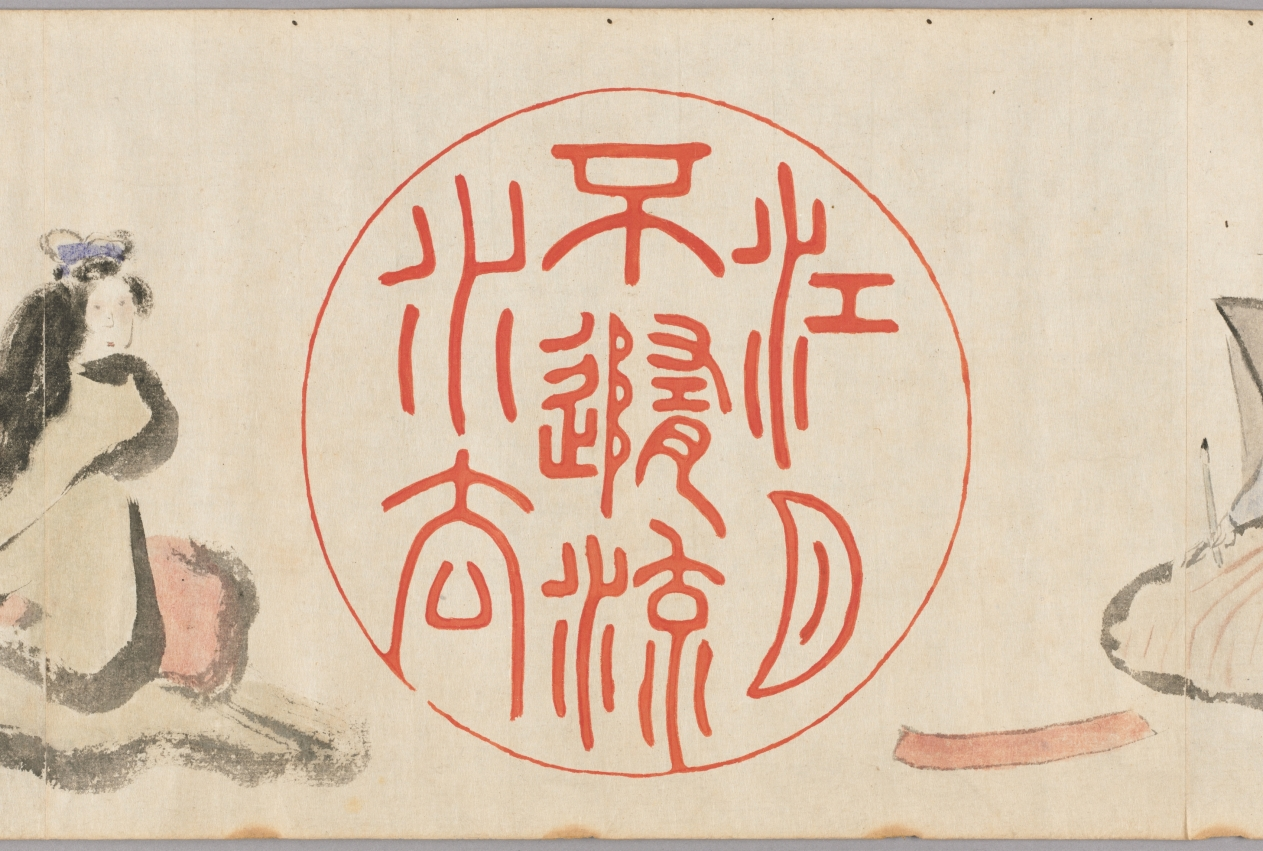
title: Chinese Seals and Poets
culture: Japan, Edo period (1615–1868)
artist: Hosokawa Rinkoku (Japanese, 1779–1843)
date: 1842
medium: handscroll; ink and color on paper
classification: Painting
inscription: Eight seal impressions are painted in red and alternate with sketchily painted figures. Artist's colophon at end of scroll.